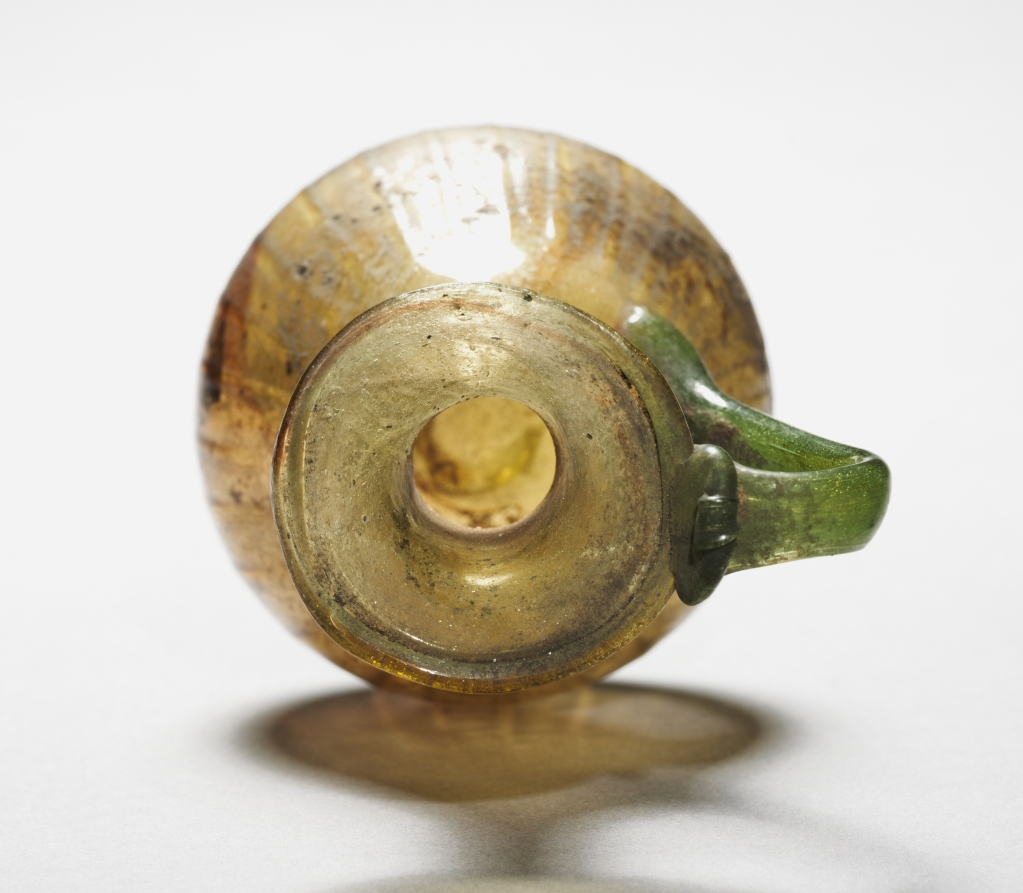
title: Pitcher with Handle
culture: Syro-Palestinian, Roman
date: 300s CE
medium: glass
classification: Glass